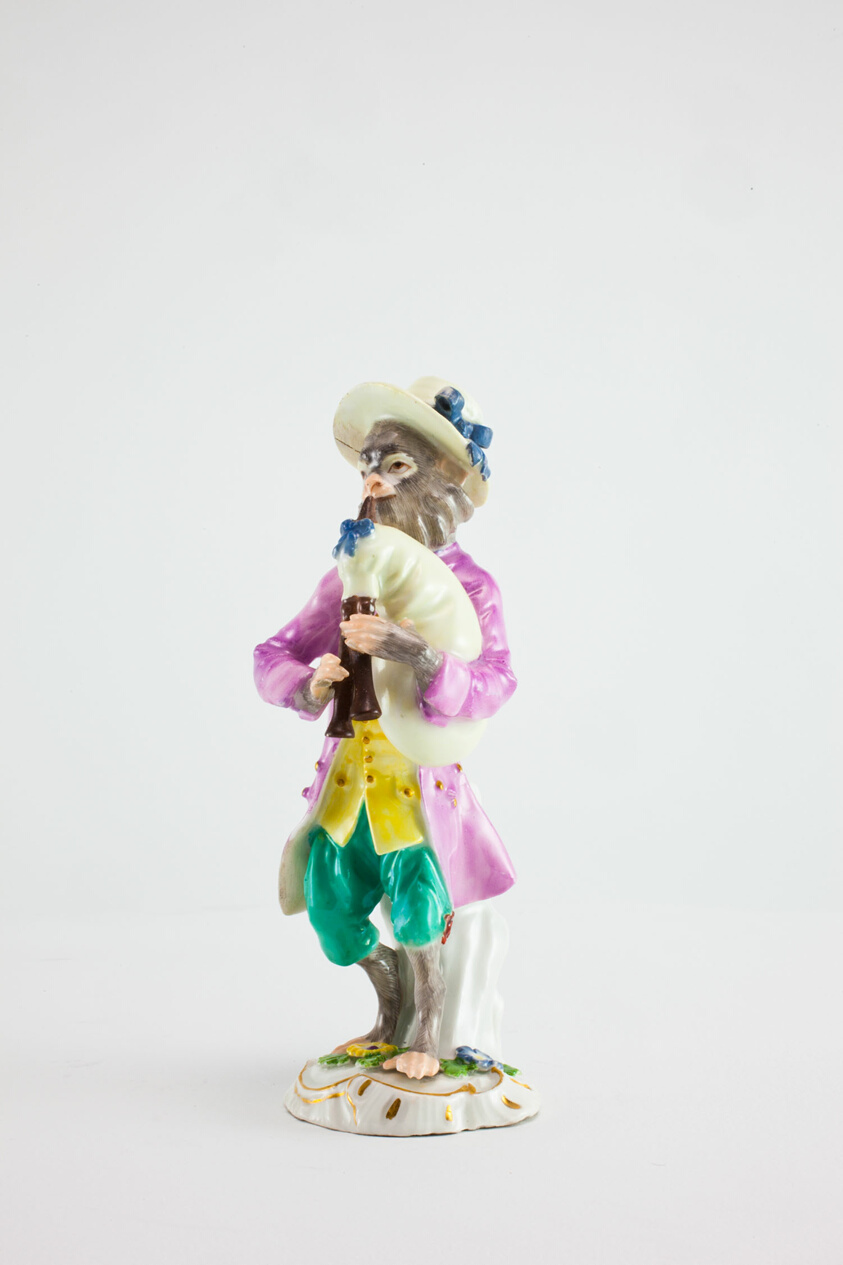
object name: Ceramics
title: Bagpiper for the Monkey Band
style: Rococo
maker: Meissen Porcelain Manufactory; German, founded 1710; After a model of Kändler or Reinicke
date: c. 1765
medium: Hard-paste porcelain, polychrome enamels, and gilding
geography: Meissen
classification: sculpture; ceramics; porcelain; european decorative arts